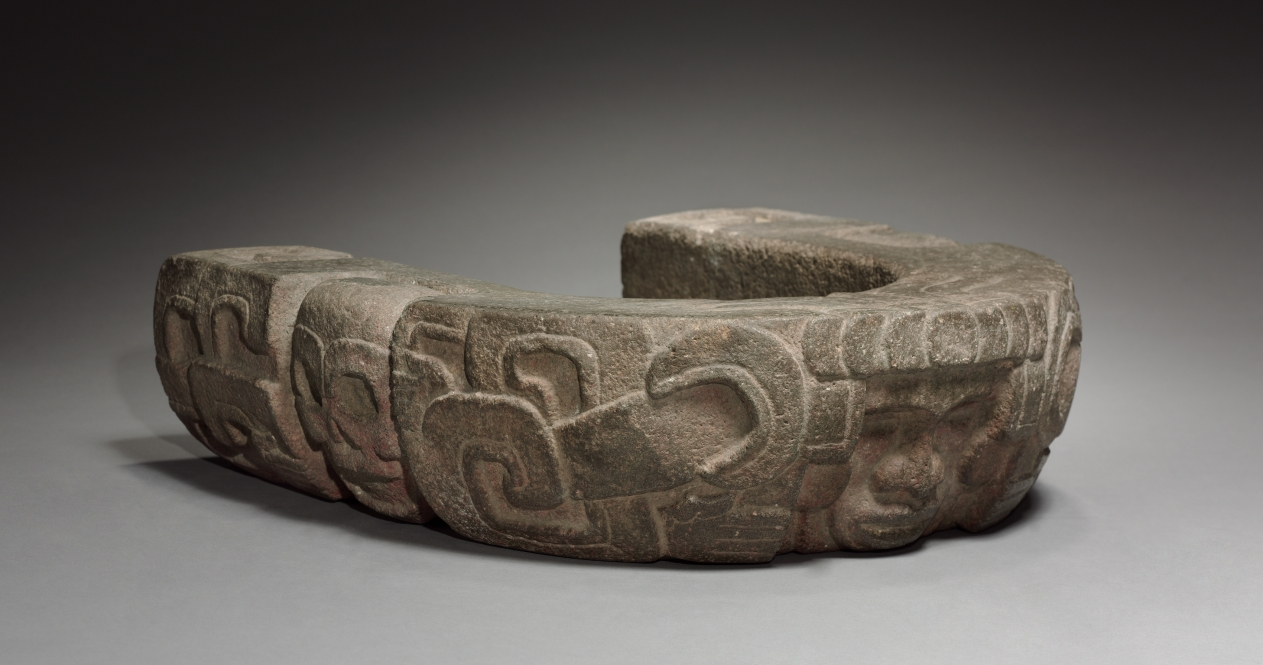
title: Yoke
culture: Mexico, Classic Veracruz Style, 7th-10th Century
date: c. 600–900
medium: stone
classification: Sculpture